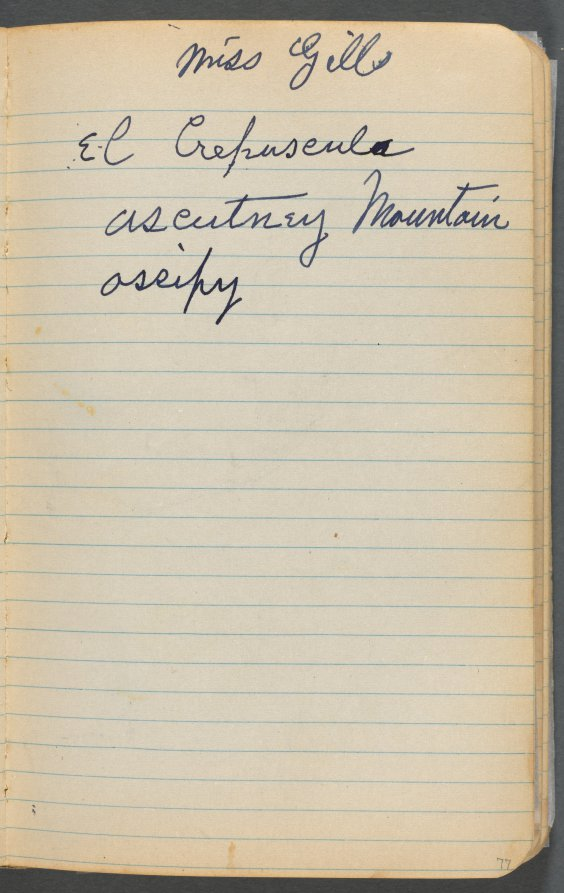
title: Sketchbook, page 077: Notes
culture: America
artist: Maurice Prendergast (American, born Newfoundland [now Canada], 1858–1924)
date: 1905–10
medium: graphite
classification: Bound Volume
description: This sketchbook contains 69 pages of drawings, a diary largely devoted to the state of the artist's health, and a three-page discourse on the nature of genius and ideas.